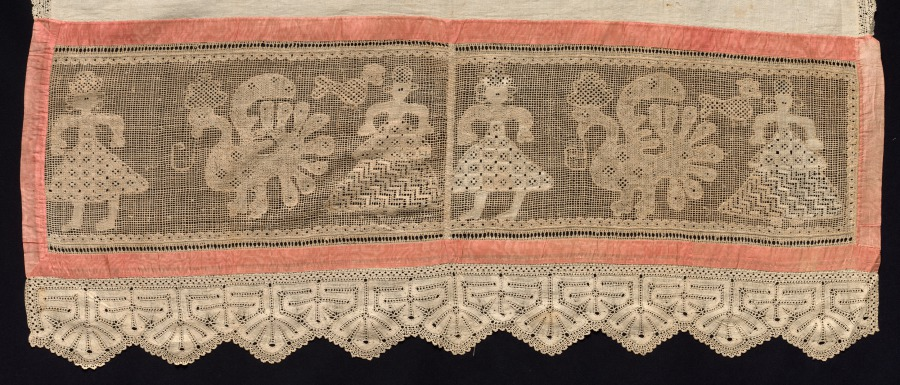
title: Cloth with Border of Female Figures and Peacocks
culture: Russia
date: 1700s–1800s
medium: Linen: needle lace (cutwork and drawnwork), straight (continuous) bobbin lace, (tape lace) edging; applied silk (est.) ribbon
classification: Lace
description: This cloth may have functioned as a towel. On one end, there are two panels of lace work surrounded by pink silk ribbon. Within each panel are two women flanking a stylized peacock. A smaller bird flies near the head of the woman on the right side of each panel.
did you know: Handmade lace for marriage dowries was produced at large quantities in Russia during the eighteenth and nineteenth centuries.